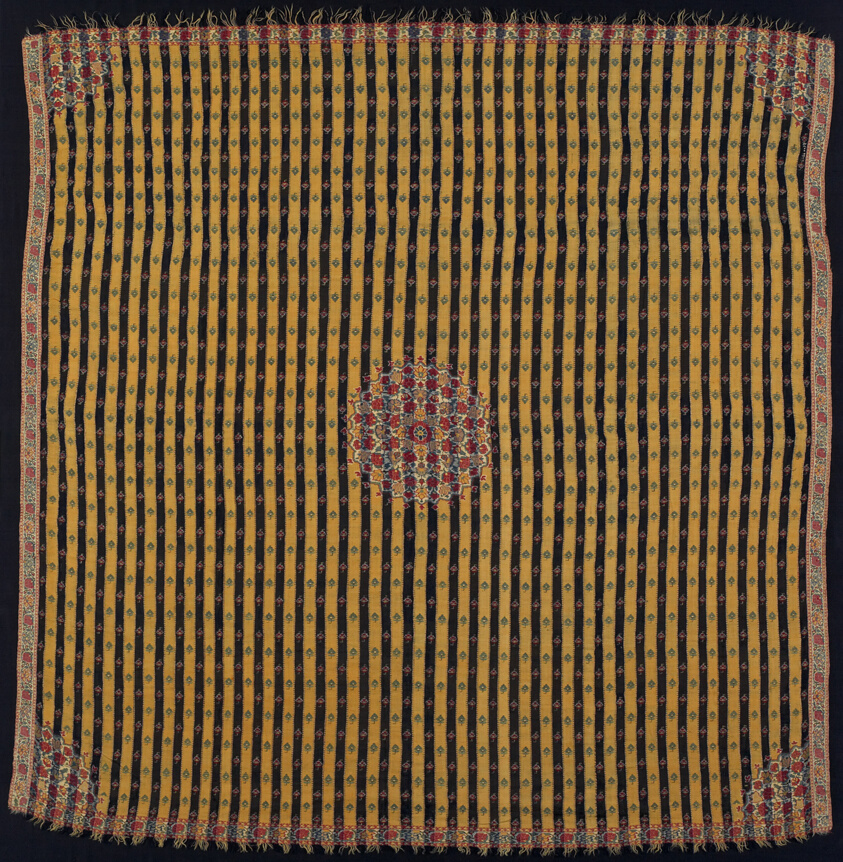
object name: Costume and Accessories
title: Moon Shawl (Chand-Dar)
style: mughal, Indian (South Asian)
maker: Kashmir, India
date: Mughal period (1526–1858), late 18th century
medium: Wool (pashmina), double interlocking twill tapestry weave; twisted warp fringe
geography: India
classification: textile; weaving; costume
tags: costumes